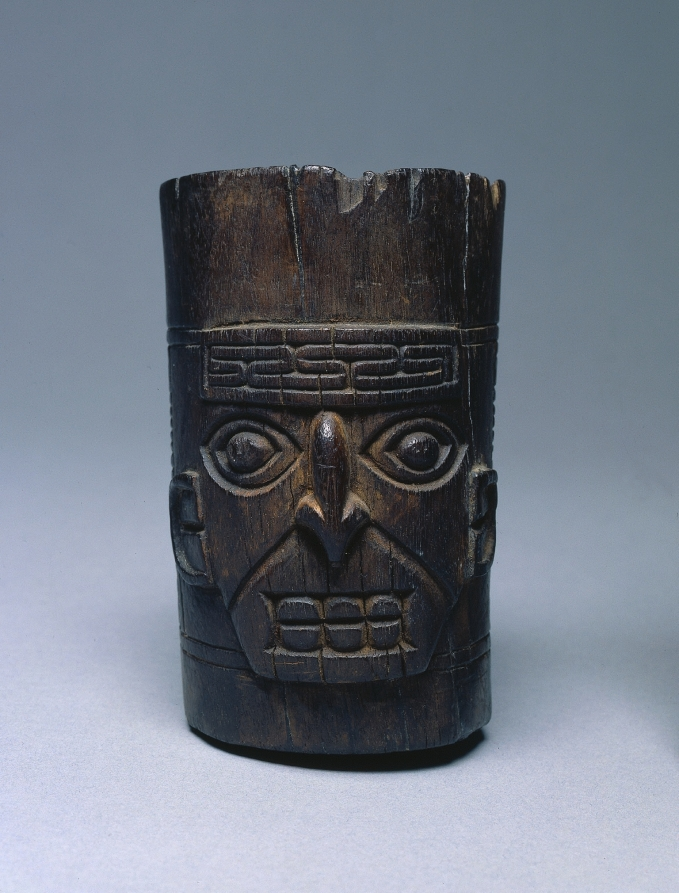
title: Cup with Head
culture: Peru, North-Central Coast(?), 9th-10th Century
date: 800–1000(?)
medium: wood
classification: Sculpture